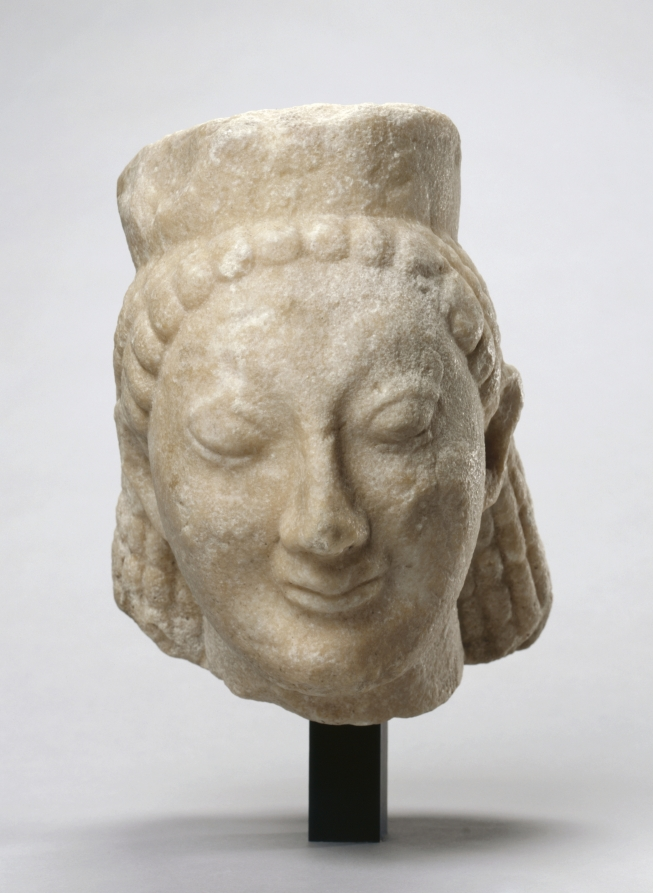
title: Head of a Sphinx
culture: Greece, Archaic period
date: 540–520 BCE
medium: marble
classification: Sculpture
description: This female head once belonged to a sphinx, a mythological hybrid creature with the head of a woman and body of a winged lion. Her short cylindrical crown, known as a polos, helps to identify her as a sphinx, as does the slope of her hair and neck, which once continued onto a feline body. Also common in ancient Egyptian and Near Eastern art (though more often in male form), the sphinx is best known in Greek mythology for devouring passersby who could not answer her riddle outside the Boiotian city of Thebes. Stone sphinxes like this one served as both votive offerings and grave monuments in Archaic Greece.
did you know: Greek sphinxes were often placed on top of columns or grave stelai as guardian figures.